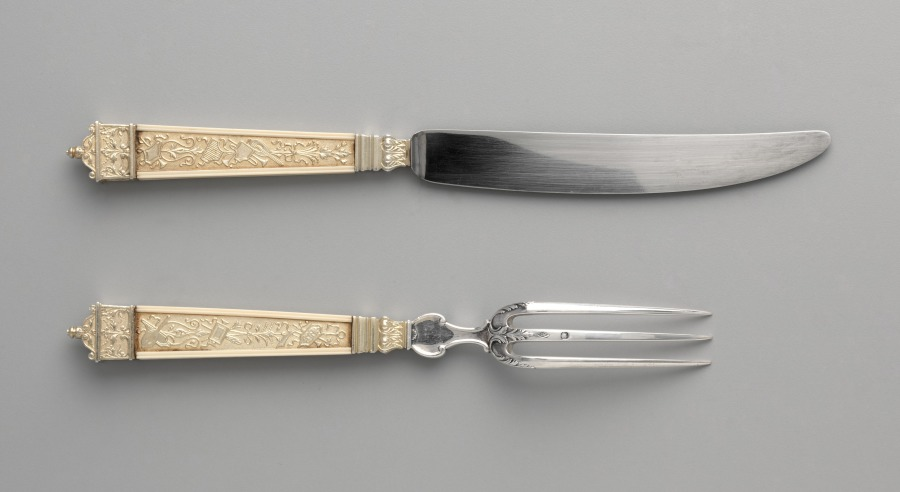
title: Dessert Knife and Fork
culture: France, 19th century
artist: Maison Cardeilhac (French)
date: c. 1880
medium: gilt silver and ivory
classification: Silver